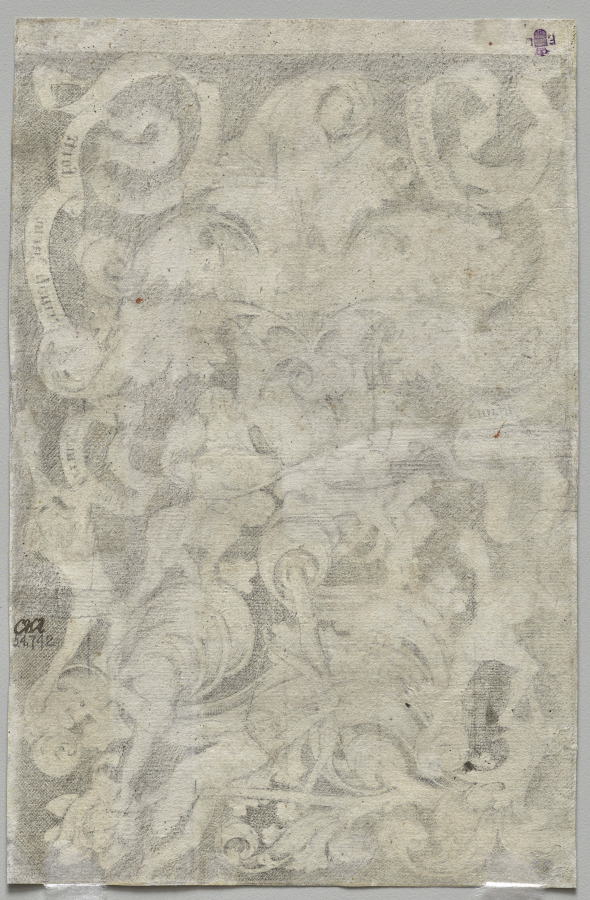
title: Upright Ornament with Eight Naked Men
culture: Germany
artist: Israhel van Meckenem (German, c. 1440–1503)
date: c. 1495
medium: engraving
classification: Print